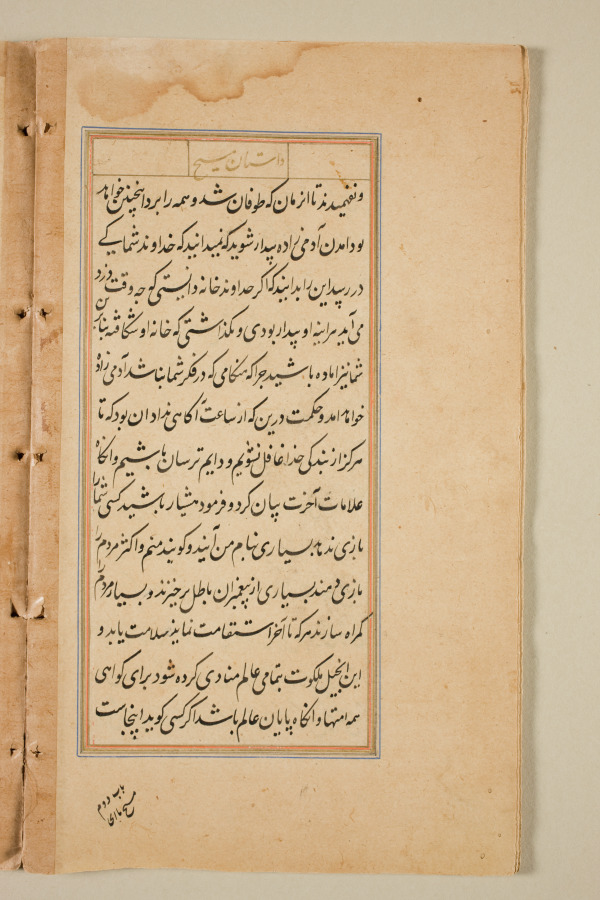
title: Text page from a Mirror of Holiness (Mir’at al-quds) of Father Jerome Xavier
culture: Mughal India, Allahabad, made for Prince Salim (1569–1627)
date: 1602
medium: Ink and gold on paper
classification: Manuscript